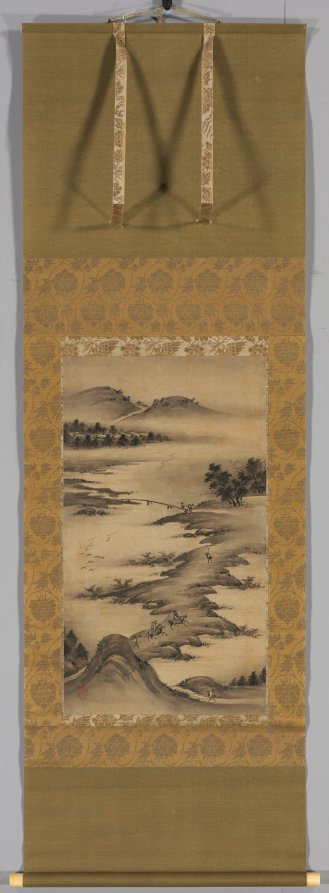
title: Seasonal Landscapes: Autumn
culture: Japan, Muromachi period (1392–1573)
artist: Kano Hideyori (Japanese, active mid- to late 1500s)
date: mid- to late 1500s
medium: hanging scroll, ink on paper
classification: Painting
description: Now comprising three scrolls, this composition was originally a set of four paintings depicting the seasons. The set is among the most important of the artist’s surviving works. Each painting was executed in the gyō mode, indicating a speedy brush with rounded strokes. The terms shin (formal), sō (cursive), and gyō (semicursive), borrowed from calligraphy terminology, are terms commonly used by connoisseurs to describe brushwork in ink paintings.